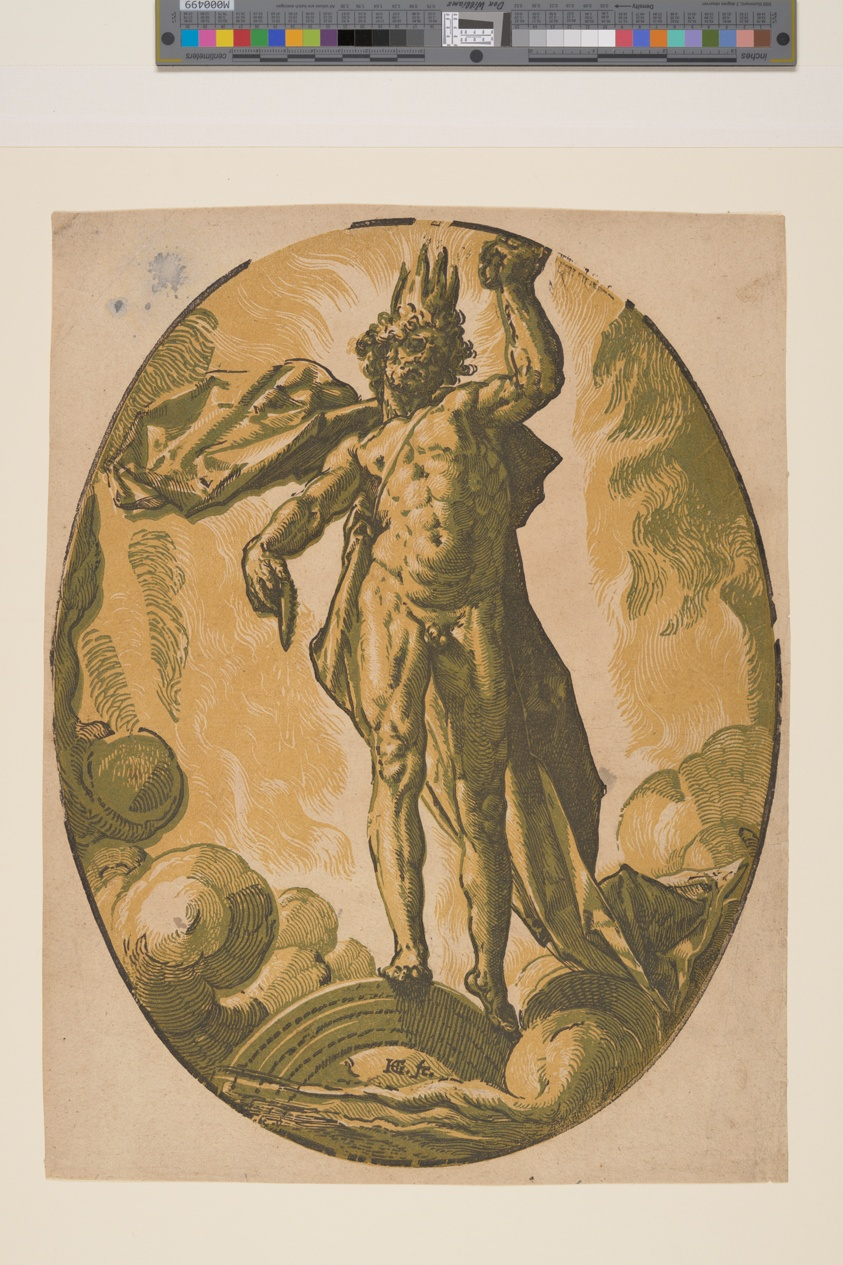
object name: Print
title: Helios, from The Deities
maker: Hendrick Goltzius (Dutch, 1558–1617)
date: 1588/90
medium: Chiaroscuro woodcut from three blocks in yellow and green on ivory laid paper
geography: Netherlands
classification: print; paper; prints and drawing; woodcut